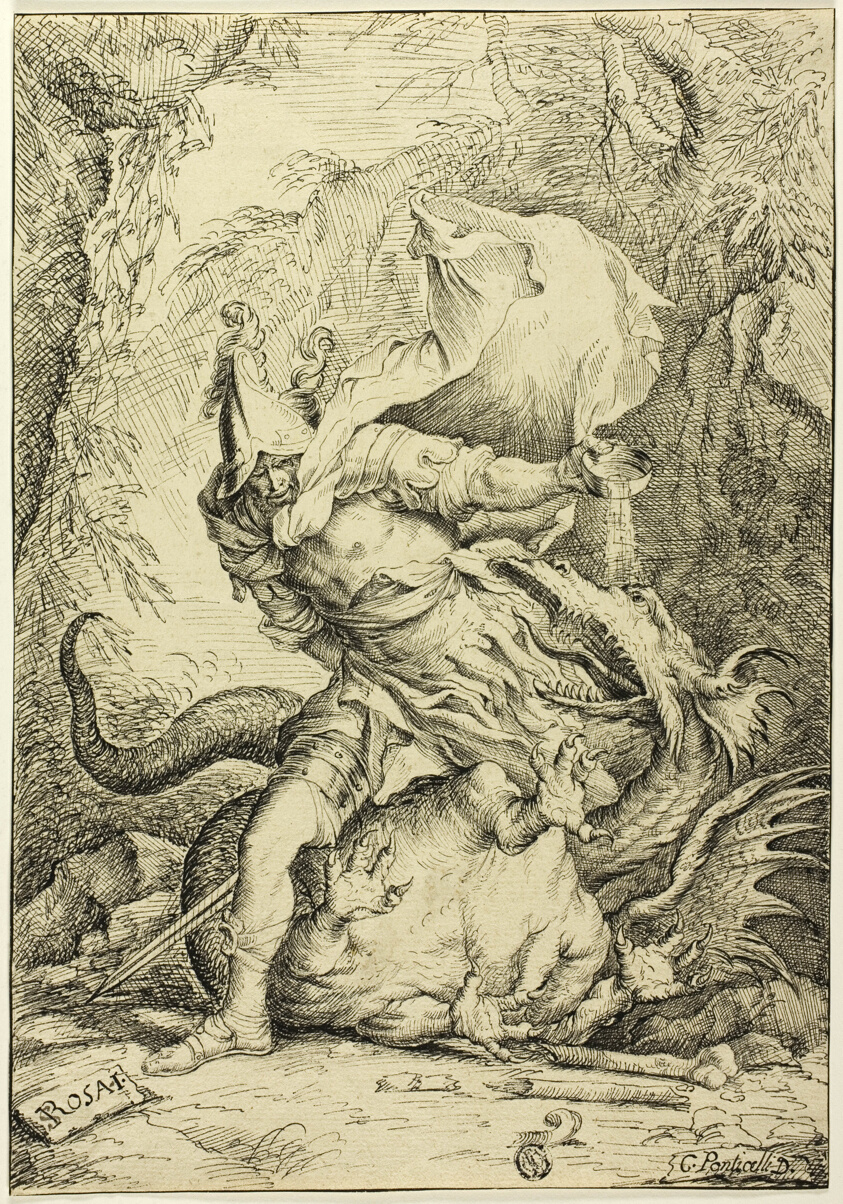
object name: Drawing and Watercolor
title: Saint George and the Dragon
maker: Attributed to Giovanni Ponticelli (Italian, active 1855-1877); after Salvator Rosa (Italian, 1615-1673)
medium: Pen and black ink on ivory laid paper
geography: Italy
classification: pen and ink drawings; drawings (visual works); prints and drawing